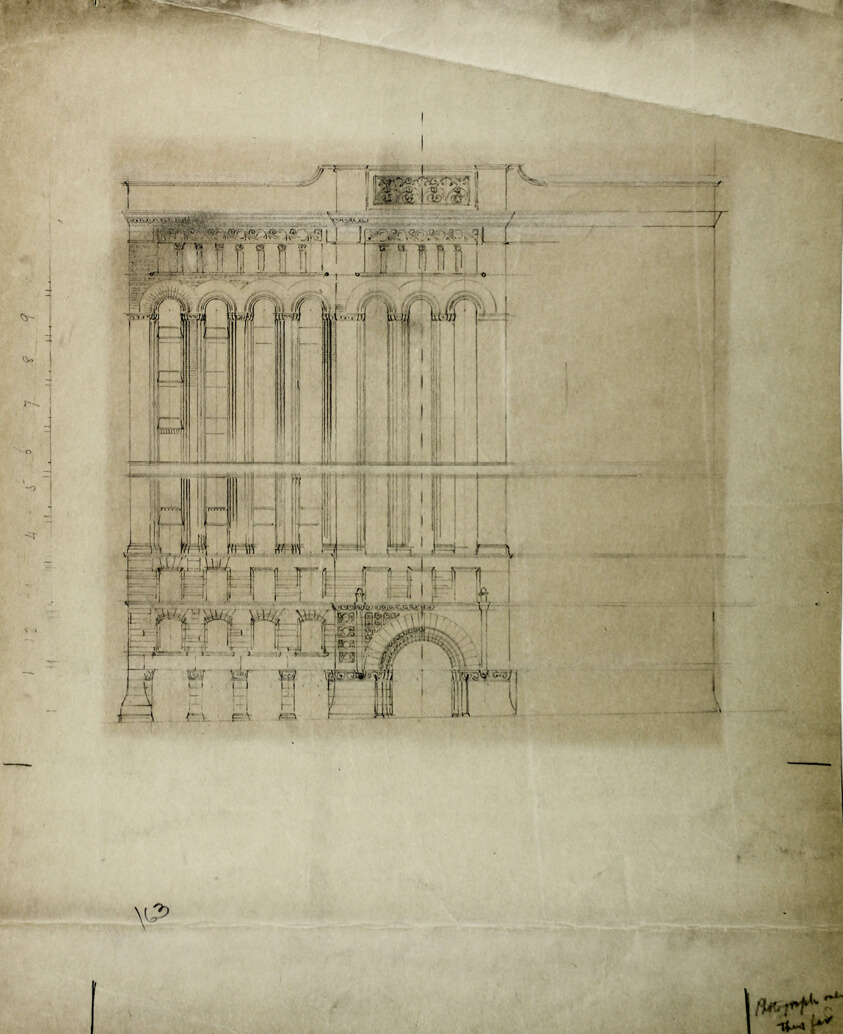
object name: Architectural Drawing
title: Mills Building, San Francisco, California, Design Sketch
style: 19th century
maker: Burnham & Root; American, 1873–1891; John Wellborn Root; American, 1850–1891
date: c. 1890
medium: Pencil on manila drawing paper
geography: United States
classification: architectural drawing; architectural detail; architecture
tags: design sketch, architecture